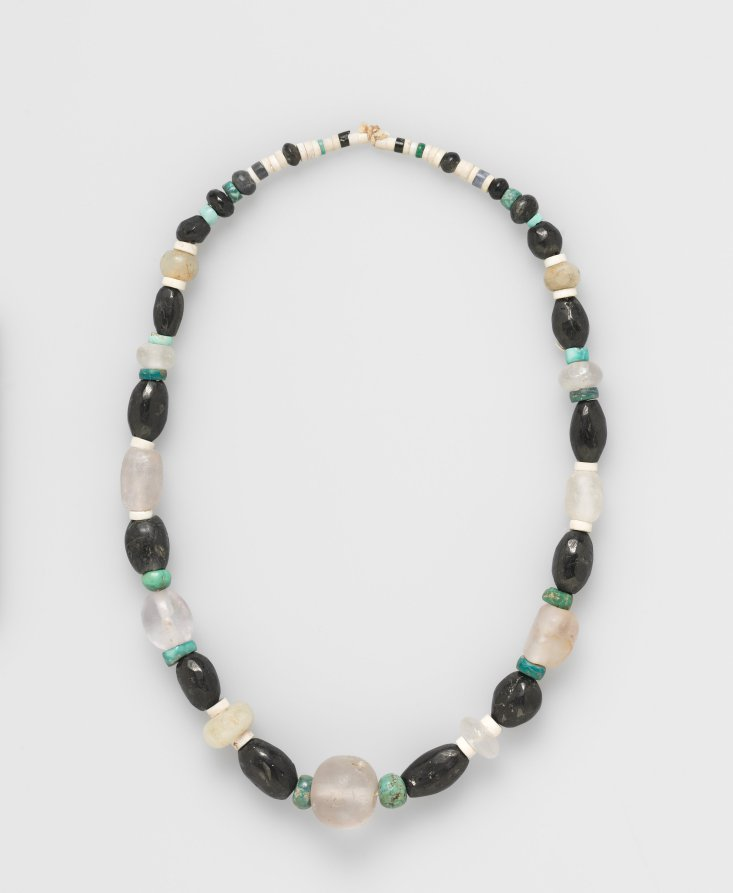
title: Necklace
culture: Peru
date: before 1532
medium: polished stone beads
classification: Jewelry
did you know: These ancient beads were restrung in modern times.